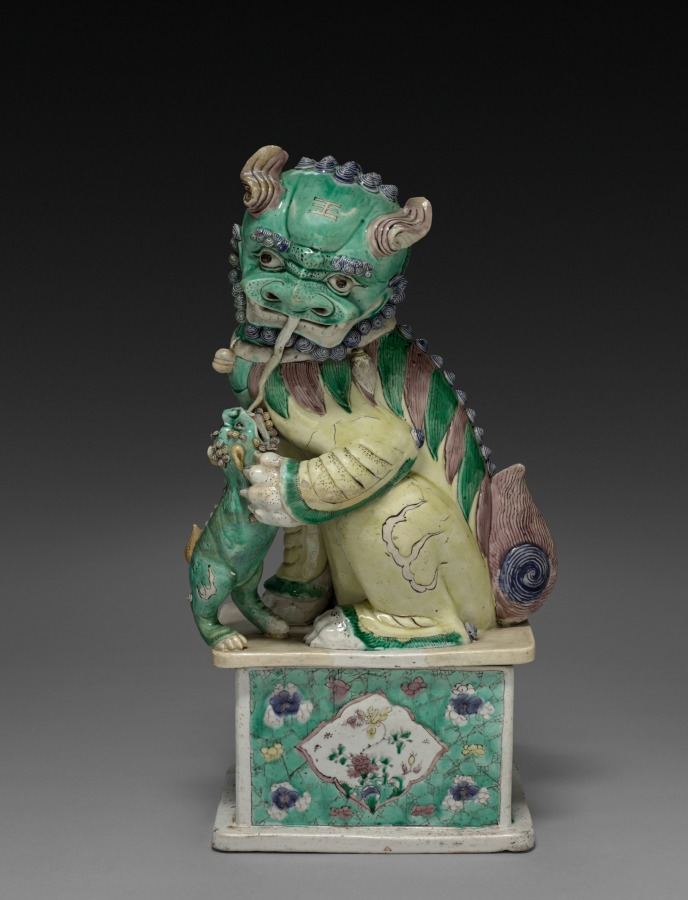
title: Lion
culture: China, Qing dynasty (1644-1911), Kangxi reign (1661-1722)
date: 1662–1722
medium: porcelain with overglaze enamel decoration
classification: Sculpture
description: This porcelain lion is a pair with 1930.643. The female is with a cub, while the male lion holds a ball. Guardian lions were traditionally placed in front of buildings to protect from harmful spiritual or human forces.